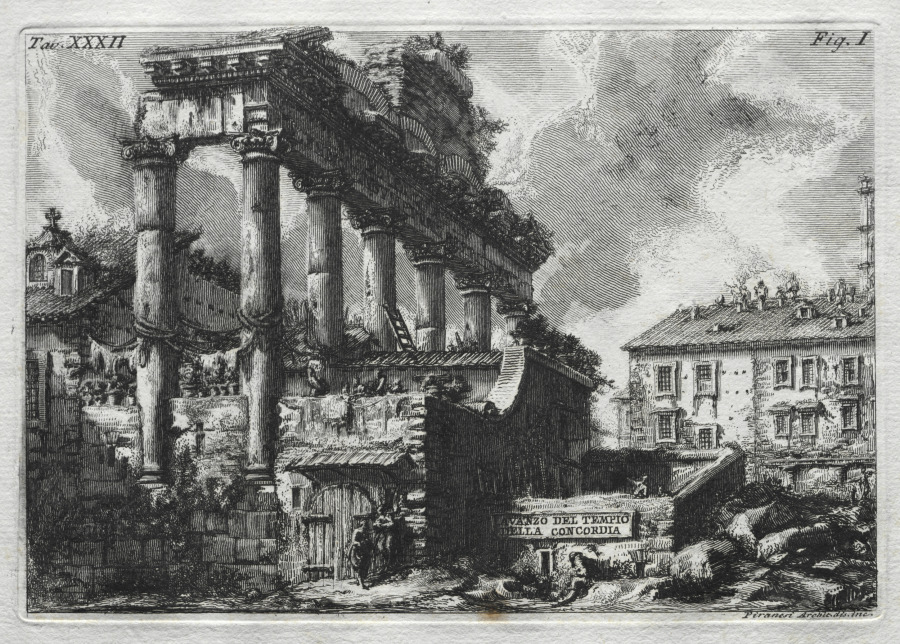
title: Avanco del Tempio della Concordia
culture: Italy, 18th century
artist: Giovanni Battista Piranesi (Italian, 1720–1778)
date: 1756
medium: etching and engraving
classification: Print